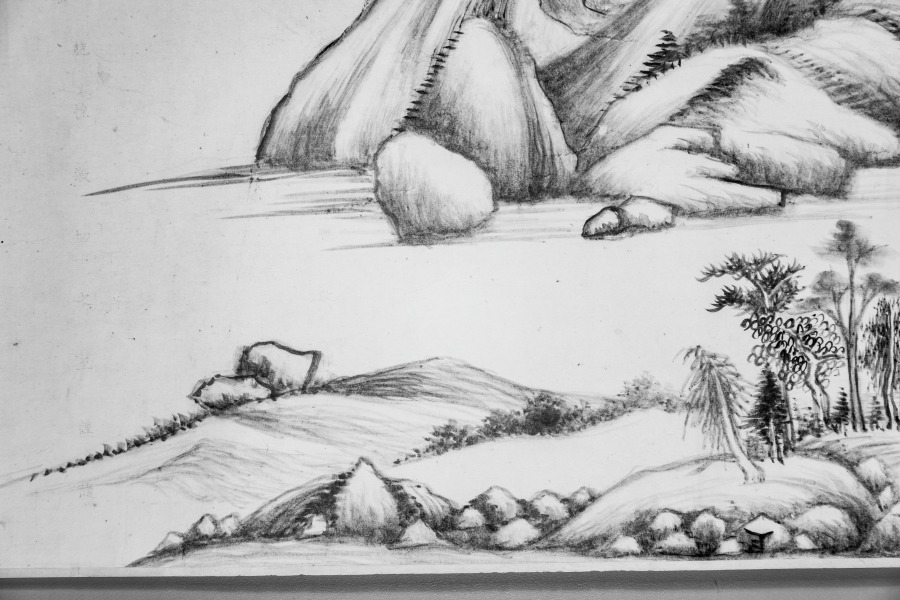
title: River and Mountains on a Clear Autumn Day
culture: China, Ming dynasty (1368–1644)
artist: Dong Qichang (Chinese, 1555–1636)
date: c. 1624–27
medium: Handscroll; ink on Korean paper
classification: Painting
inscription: 黃子久江山秋霽似此，當恨古人不見我也。思翁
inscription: 董文敏每遇高麗鏡面箋，書畫尤為入神。此卷改表紙用之，字跡隱然，兼有朝鮮之印。至於筆法圓秀，真接倪黃。豈文沈所可同日而語也。 康熙庚午中秋後一日，天氣澄爽，重裝初畢，跋於瓶廬。抱瓮翁高士奇。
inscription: Second inscription by Gao Shiqi 高士奇 (1645–1704): On the twenty-third day of the ninth month, the jiaxu year of the Kangxi era [1694], I packed my bags to head north. When my boat passed Wuchang [Suzhou], Mr. Mantang [Song Luo] brought wine to bid me farewell so that we could share our thoughts on our separation in the last few years. I showed him the paintings and calligraphy which I collected and asked his opinions. Since Mr. Mantang does not own any handscrolls by Wenmin [Dong Qichang], I leave this one for him in commemoration of our parting; thus the painting will have a worthy owner and our meeting will become a beautiful story in the future. It is the fourth day after the beginning of winter, with the sky clear and sober. Trees under frost have turned red and yellow, seemingly echoing the brush and ink in the painting. I also ask Mr. Mantang to inscribe a poem to commemorate our meeting so that it will survive forever.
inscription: 1 colophon and 4 seals of Song Luo 宋犖 (1634–1713): Who is the foremost art connoisseur of our dynasty?/ Tangcun [Liang Qingbiao, 1620–1691] is dead, so the title passes to Jiangcun [Gao Shiqi]./ Leaving office, you retired for five years in the Lake region./ Fondling handscrolls and hanging scrolls from morning to evening./ You sent me your collection catalogue Xiao Xia Lu last year;/ It is indeed the true equal of [Zhou Mi's] Yun Yan Guo Yan./ This year you returned to the capital by imperial order;/ Your boat with calligraphy and paintings anchored at the river bank in Suzhou./ When we met each other you did not waste any time for conversation by poured out immediately/ From your "coral net" extraordinary treasures./ You produced incomparable scrolls, with gold-inscribed labels and jade rollers,/ Pouring out from bags and trunks, they were spread in disarray./ Without a word, I rolled and unrolled until my fingers were numbed,/ We sat straight, facing each other quietly, and never felt tired./ For three days we forgot about sleeping and food./ And at times we shouted our joy out loud, forgetting who is host or guest./ Your Dwelling in the Fuchun Mountains and the Yuansheng manuscript/ These peerless works I myself examined with delight./ As an added pleasure to the farewell dinner under the Maple Bridge,/ You allowed me to hold again this handscroll by Dong Qichang--/ The Misty River and Piled Peaks [by Zhao Mengfu] and this Clear Autumn Day are two extraordinary masterpieces./ In showing such life and spirit with "qi yun." the artists were truly "men of heaven."/ The Clear Autumn Day is not even three feet long,/ Painted on tributary Korean paper, it shines like silver./ Every building up and every turn of the mountains imitates nature,/ Every tree and every rock is removed from the commonplace./ From the beginning, the theory of poetry is the theory of painting,/ Like the lotus and the morning sunshine, they complement and refresh each other./ The artist's inscription regrets that "the Old Masters cannot see my scroll."/ Huang Gongwang would have agreed in his grave./ The vermilion of the seals glitter and dazzles the eyes,/ These added accessories are as valuable as jade./ You are very kind to give it to me,/ The feelings expressed in your inscription are so sincere./ Wanting to refuse, but unable, I accept it to respect your wish,/ And taking off my gown and cap I wrapped it with care./ You asked me to write a long poem in commemoration of this beautiful occasion,/ I am too ashamed that my effort in response is so poor and inadequate./ Returning home, I unrolled it under candlelight, trying to write the colophon,/ The light of the waning moon shines at the foot of the mossy wall./ Earnestly humming and brows knit in deep thought, I try to compose;/ The verses are not outstanding, but the facts are real./ With this poem recorded at the end of the scroll, I mail it to you for approval,/ This poem and this painting shall outlast a thousand springs. (Translation by LYSL/HK/WKH)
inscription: 1 colophon and 2 seals of Shao Changheng 邵長蘅 (1637–1704); 2 inscriptions and 14 seals of the Qianlong 乾隆 emperor (r. 1736–95); 1 seal of the Jiaqing 嘉慶 emperor (r. 1796–1820); 3 seals of the Xuantong 宣統 emperor (r. 1908–11); 1 seal unidentified.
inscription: [印] 朝鮮國王之印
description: Dong Qichang had a tremendous impact on the artistic practices and historiography of later generations; his works and writings shaped literati aesthetics. Here, Dong places an abstract landscape composition diagonally across the picture plane, configured to recall earlier masters and simultaneously express his own personal style. Dong’s inscription claims, Huang Gongwang’s Autumn Day, looks like this. I truly regret the master has not seen my work. In fact, Dong Qichang may have had Dong Yuan’s Xiao and Xiang Rivers in mind, a work he owned and considered a key work in Chinese art history.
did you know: The painting has an imprint of a Korean seal that reads "Seal of the king of Joseon."